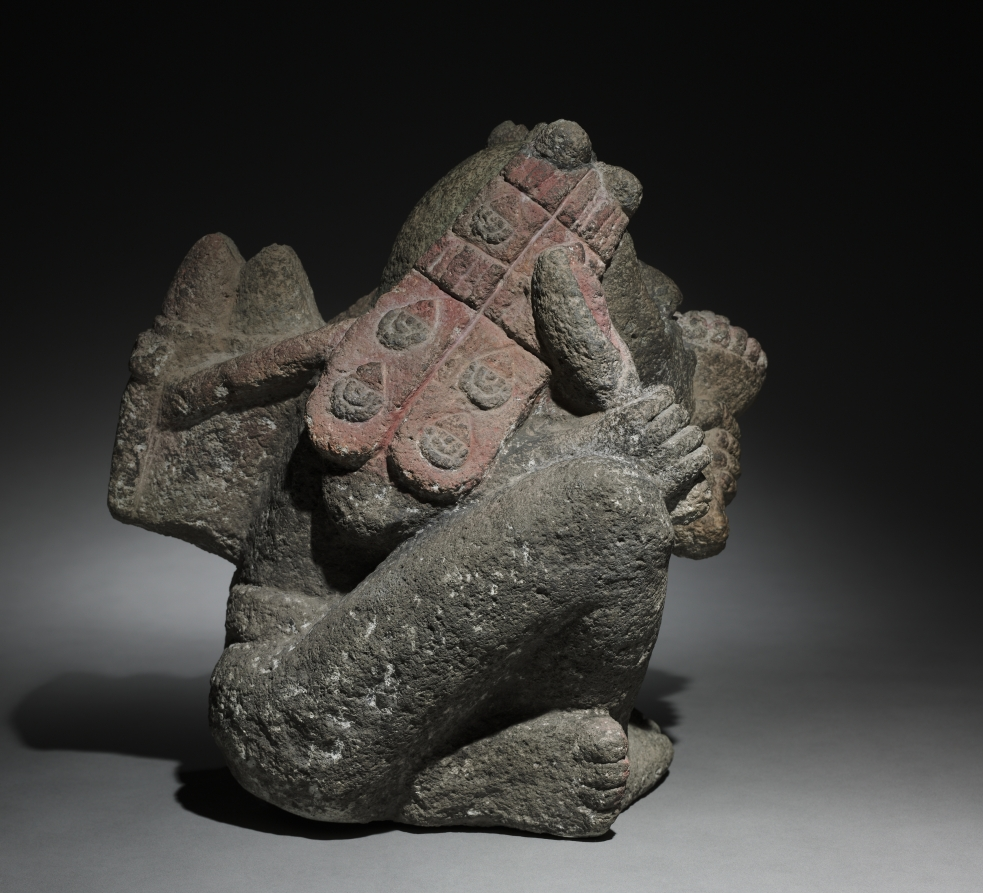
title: Seated Male Carrying Maize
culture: Central Mexico, Aztec style, 13th-16th century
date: 1325–1521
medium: stone, pigment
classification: Sculpture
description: This figure probably represents an Aztec deity-either Macuilxochitl or Xochipilli-whose domain was beauty, the arts, and such pleasures as gameplaying, dancing, and sex. Both names include the Aztec word for "flower," and in one hand the figure holds a cone of flowers, perhaps the blossoming crown of a cactus. For the Aztecs, flowers signified beauty, refinement, and fertility in general and sexuality in particular. The burden of maize cobs on his back also may allude to his creative energies.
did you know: Macuilxochitl is one of five gods of excess pleasure, and the punishment that follows.